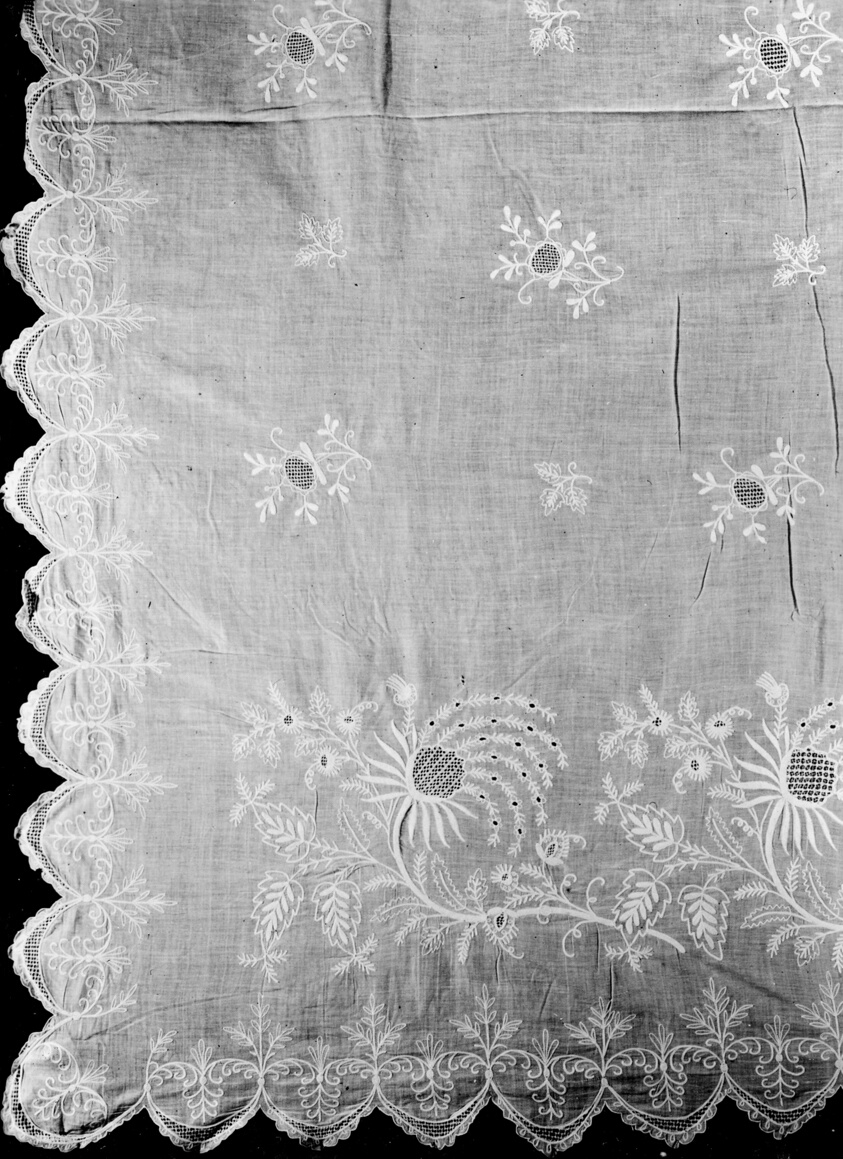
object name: Textile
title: Bedcover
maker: France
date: 19th century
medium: Muslin embroidered with cotton in tambour and satin stitches accented with drawn work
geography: France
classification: textile; needlework - quilt